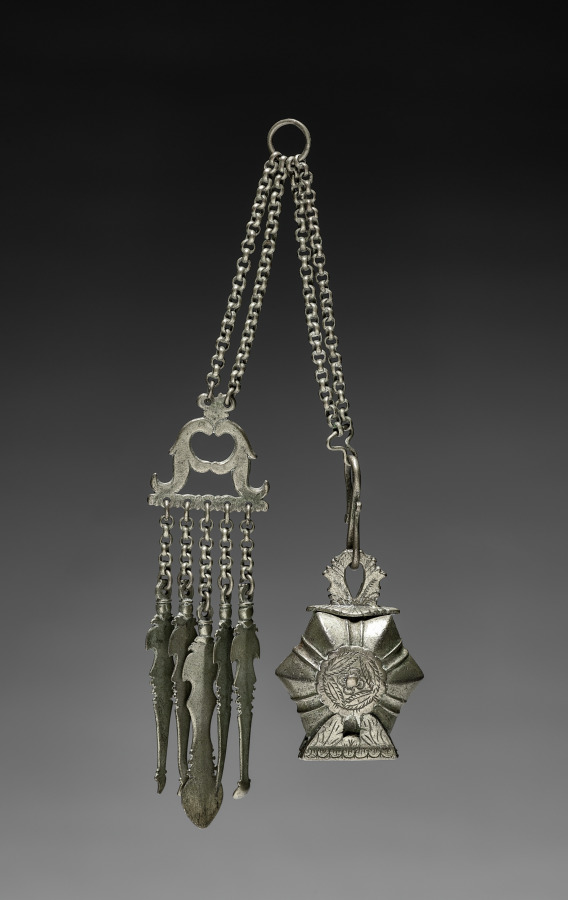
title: Betel-nut Holder and Chatelaine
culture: Burma (?)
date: 1800s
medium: silver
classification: Jewelry